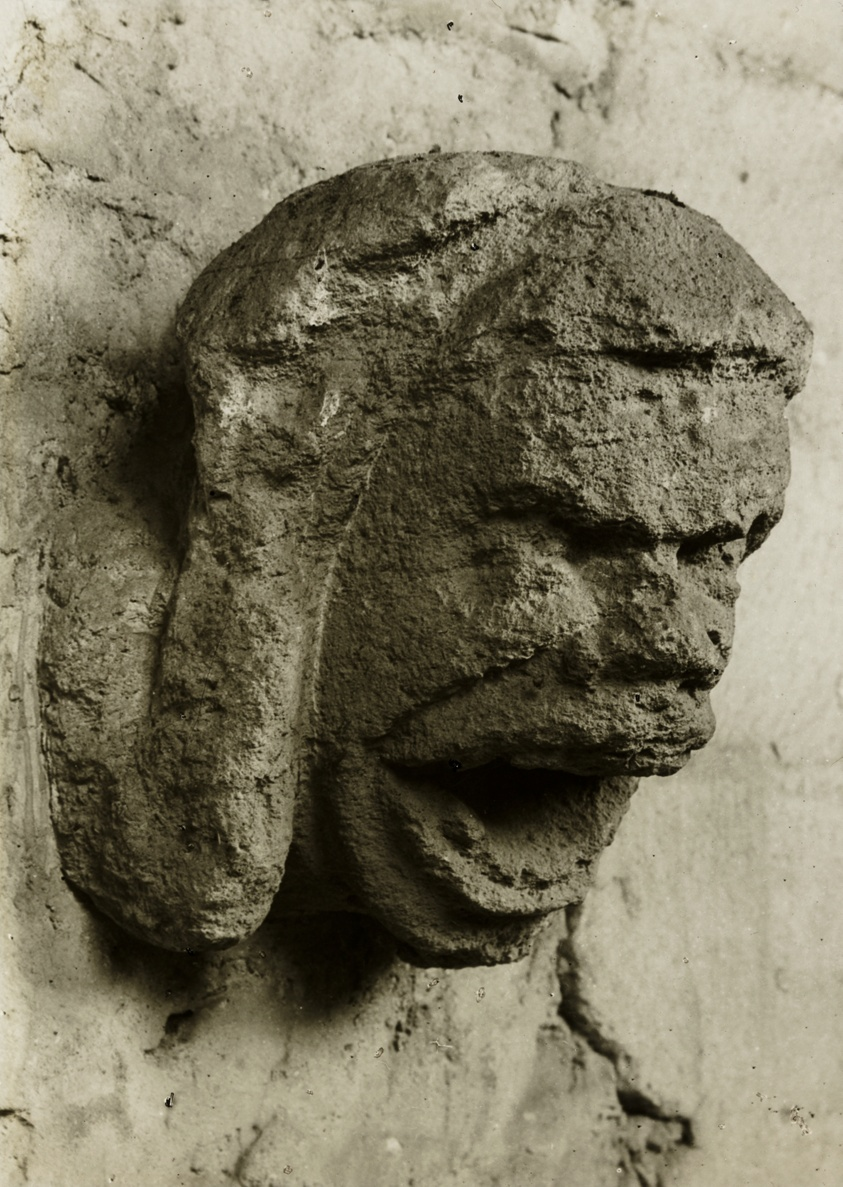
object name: Photograph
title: Ely Cathedral: Head in South Nave Triforium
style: Pictorialism, 19th century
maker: Frederick H. Evans (English, 1853–1943)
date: c. 1891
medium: Lantern slide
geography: England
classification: photograph; photography